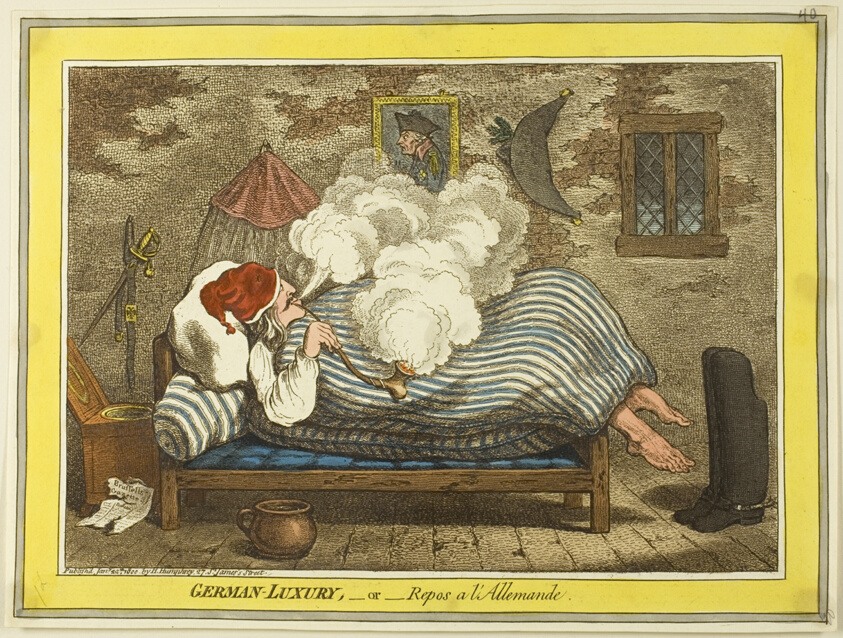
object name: Print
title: German Luxury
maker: James Gillray (English, 1756-1815); published by Hannah Humphrey (English, c. 1745-1818)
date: published January 22, 1800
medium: Hand-colored etching on paper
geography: England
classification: etching; print; prints and drawing